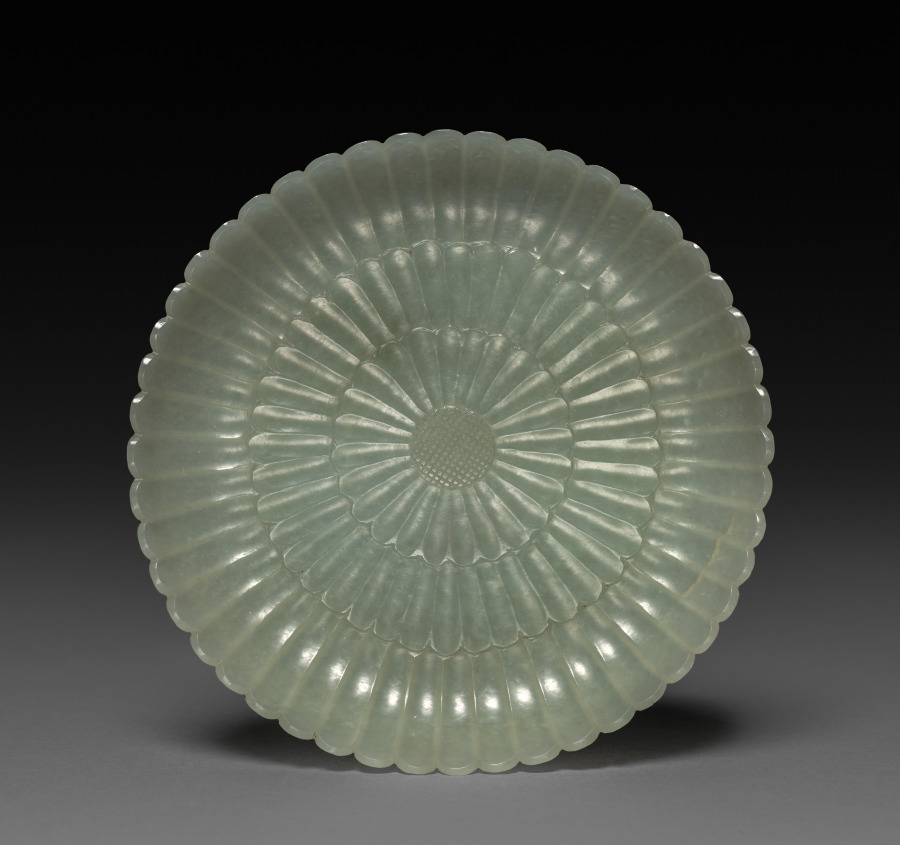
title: Plate in the Form of a Chrysanthemum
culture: China, Qing dynasty (1644-1911)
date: 1700s–1800s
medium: jade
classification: Jade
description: This light gray-green jade plate is carved on both sides into the shape of an open chrysanthemum. There are three tiers of concave petals and a central rondel of cross-hatched lines to indicate the pistils.